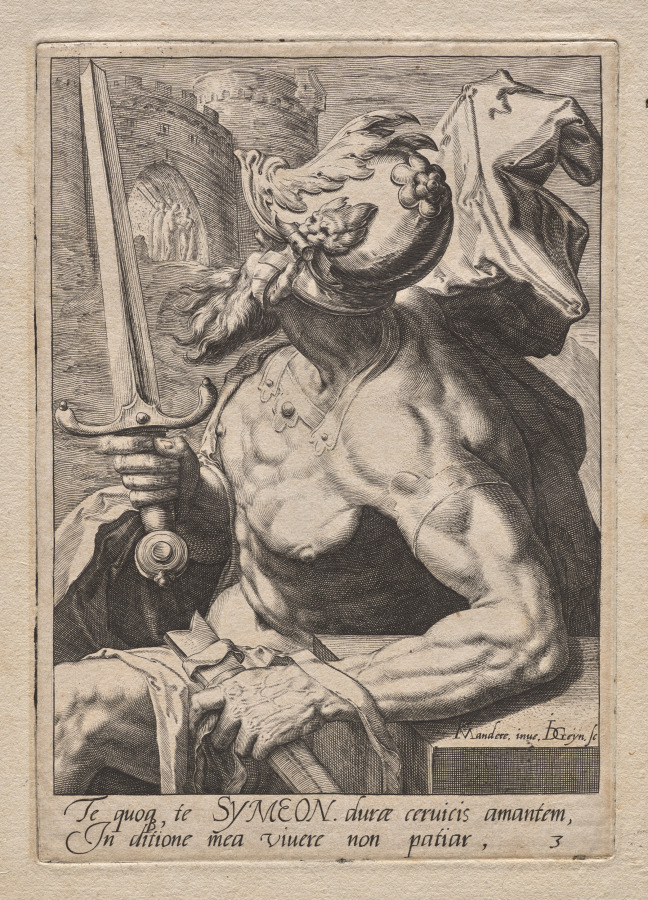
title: Plate 3: Simeon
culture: Netherlands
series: The Twelve Sons of Jacob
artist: Jacob de Gheyn II (Netherlandish, 1565–1629)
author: after Karel I van Mander (Netherlandish, 1548–1606)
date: c. 1589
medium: engraving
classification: Print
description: In this print, the biblical figure Simeon is posed with a sword and wearing armor, denoting the violent acts he perpetrated in his life. This is one of a series of prints depicting the twelve sons of Jacob, each with an attribute and costume that denotes his character. According to the Old Testament, Jacob blessed each of his twelve sons, prophesizing the destiny of their tribe, and assigning them a parcel of land in Canaan. The print series was made in the Netherlands in the late 16th century, a time of political struggle when Old Testament heroes were popular exemplars of fortitude and patience.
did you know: The bellicose nature of this figure is emphasized by his flying cloak and muscular frame, which turns away from the viewer and toward the possible subject of his ire.